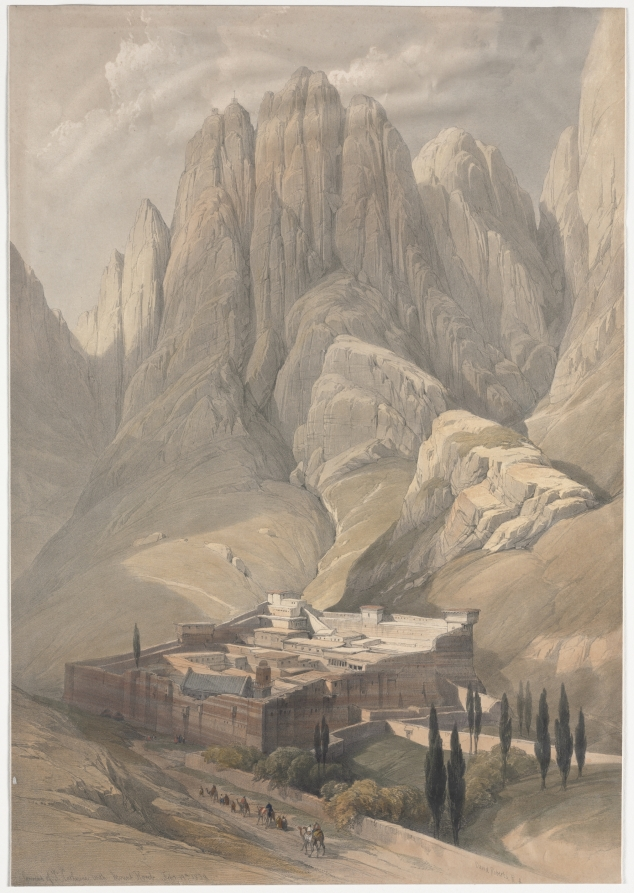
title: Convent of St. Catherine with Mount Horeb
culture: England, 19th century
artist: David Roberts (Scottish, 1796–1864)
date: 1839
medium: color lithograph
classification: Print